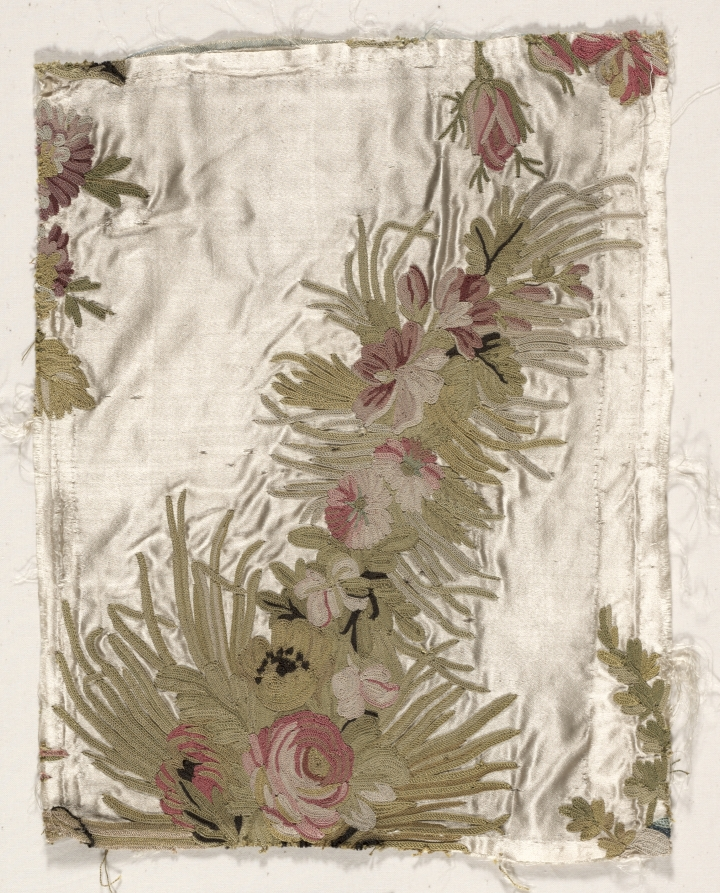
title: Coverlet Fragment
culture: France, 18th Century, period of Louis XVI (1774-1793)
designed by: Philippe de Lasalle (French, 1723–1805)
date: c. 1760–1770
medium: embroidered satin and silk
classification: Textile